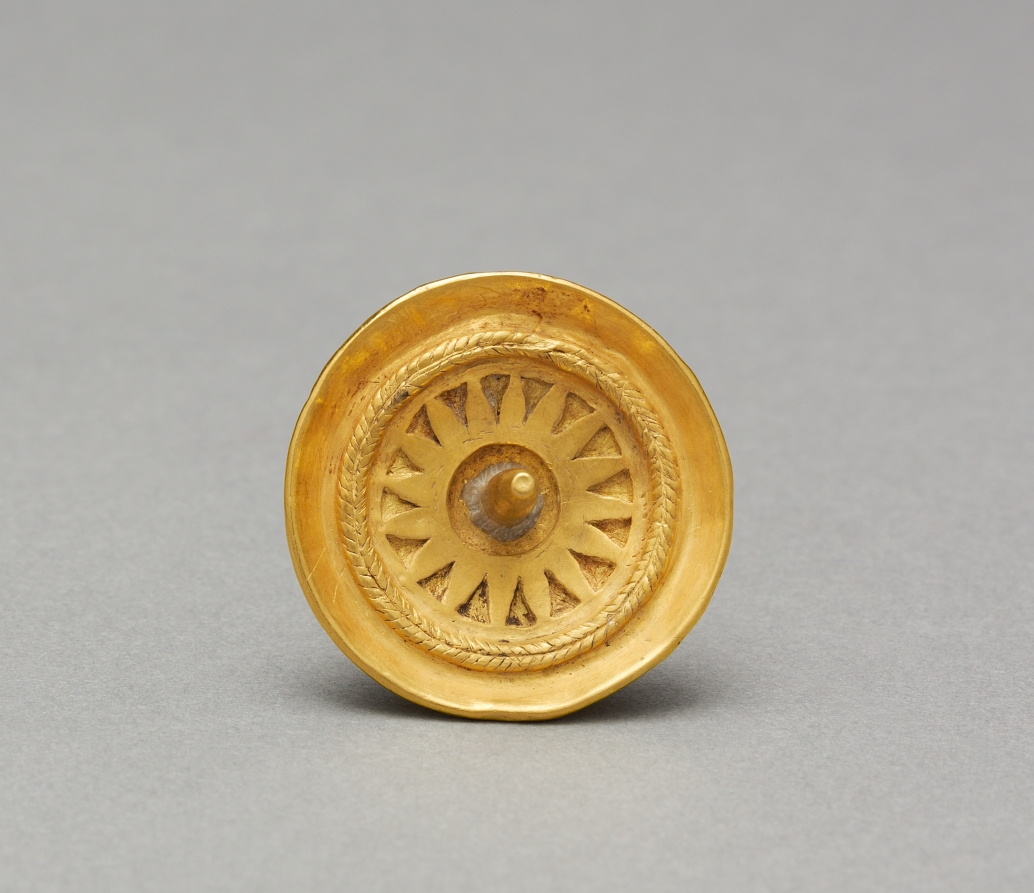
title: Ear Spool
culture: Panama, Conte style, 5th - 10th century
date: c. 400–900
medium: hammered gold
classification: Metalwork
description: Harvard archaeologists excavated these and seven other ornaments from several burials at Sitio Conte, a cemetery famous for its lavish graves of powerful chieftains. The young man buried in Grave 26 was such a chief. His status was stunningly memorialized by 21 human companions and 475 objects, many of them personal ornaments made of gold, including a large chest plaque and a rod-shaped ear ornament.